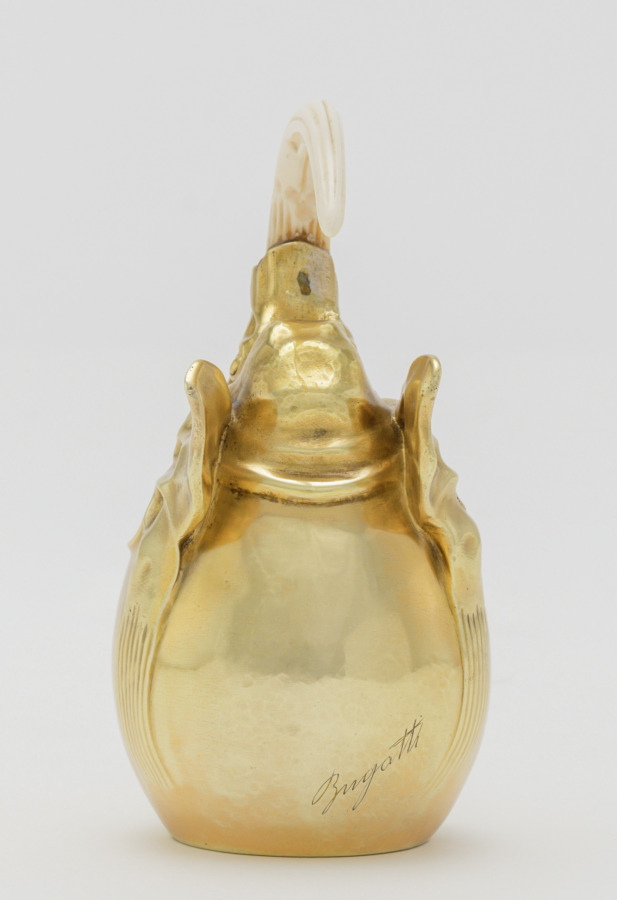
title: Creamer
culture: France, Paris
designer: Carlo Bugatti (Italian, 1856–1940)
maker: Adrien-Aurélien Hebrard (French, 1866–1937)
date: c. 1907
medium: Gilt silver and ivory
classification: Silver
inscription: Made by A. A. Hebrard Firm, Paris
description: This tea and coffee service, salver, and table, together with some now missing cups, were all designed by Carlo Bugatti as an ensemble and presented at the 1902 exposition devoted to decorative arts in Turin, Italy. The set was probably acquired from Bugatti's 1907 exhibition at the Galerie Hébrard in Paris by a wealthy South African widow, Anna Blake, who was living there at the time. Some of the animal and insect motifs suggest mythical beasts or the fossils of prehistoric animals. When Mrs. Blake returned to Cape Town, she took these and other pieces designed by Bugatti with her, and they remained in South Africa throughout her lifetime.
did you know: This creamer is part of a tea and coffee service designed by Carlo Bugatti.